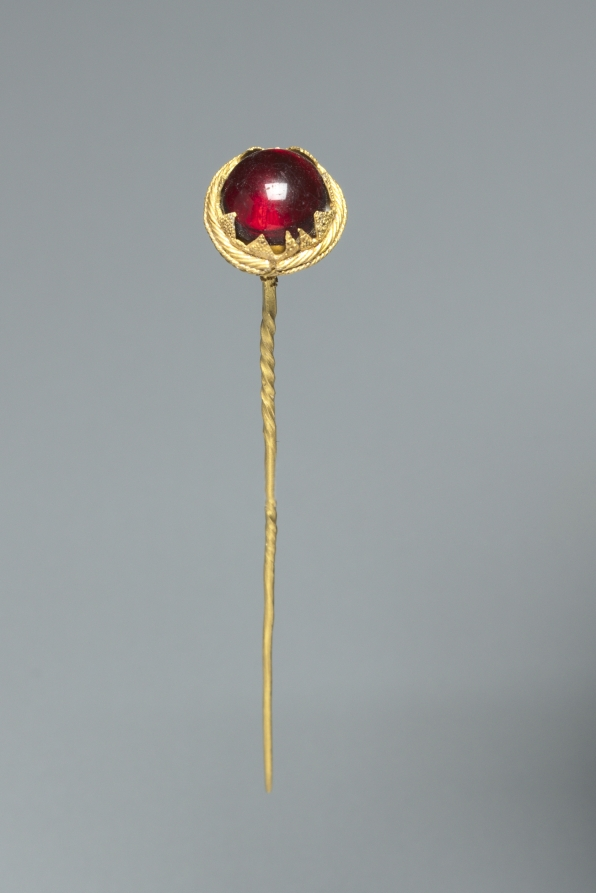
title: Straight Pin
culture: Etruscan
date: c. 500 BCE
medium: gold and glass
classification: Jewelry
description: This gold straight pin is topped with a red glass bead set in a finial. Braided gold wire and granulated triangles surround the bead. Tiny spheres forming more triangles decorate the underside of the finial, some perhaps lost. The pin is gently twisted below the finial. Although it appears to be garnet, the bead in this pin was determined to be glass after close examination by two gemologists from the Natural History Museum.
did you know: This pin was likely used to pin back women’s hair.